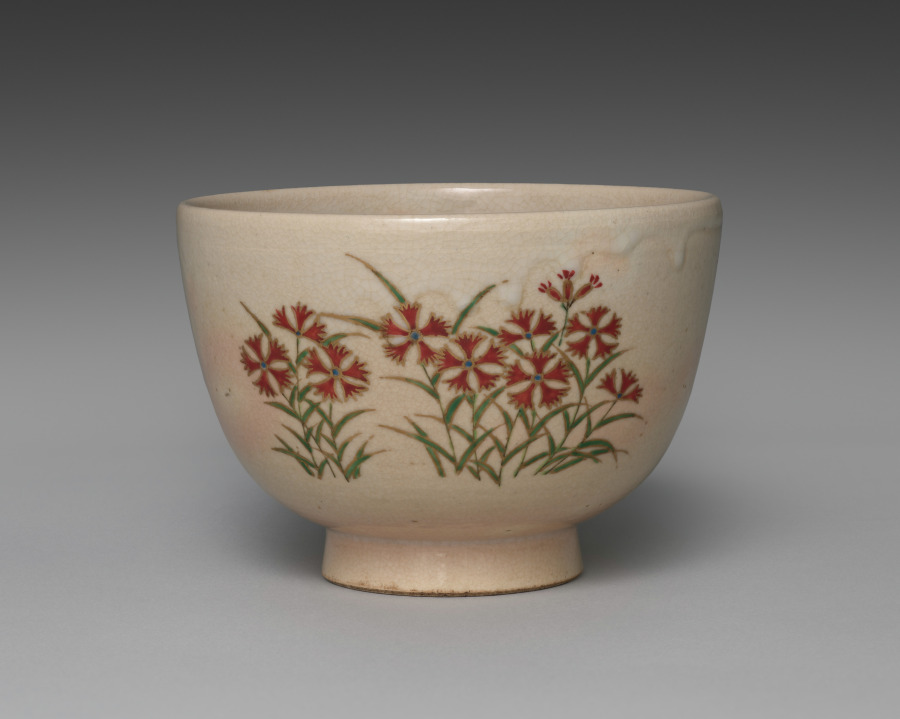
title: Teabowl with Pinks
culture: Japan, Meiji period (1868–1912)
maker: Seifū Yohei III (Japanese, 1851–1914)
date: 1893–1914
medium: Stoneware with crackled glaze and overglaze color enamel and gold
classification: Ceramic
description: This teabowl, for use in chanoyu, is a good example of Yohei III’s mastery of the techniques involved in producing Kyoto ware. The painting of the pinks, with their blue centers, bright red petals, and green leaves, is carefully controlled with crisp gold borders throughout. There is crackling in the transparent glaze and obvious, thick dripping of the milky glaze over the outside of the mouth of the bowl. The pink spots would have appeared in the clay during firing, and the bottom of the inside of the bowl is entirely pink. A triangular wedge has been cut away from the foot, and a gently impressed band rings the bowl beneath the rim.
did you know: The vessel comes with a bespoke brocade pouch with a silk fastening cord, as is customary for Japanese teabowls.